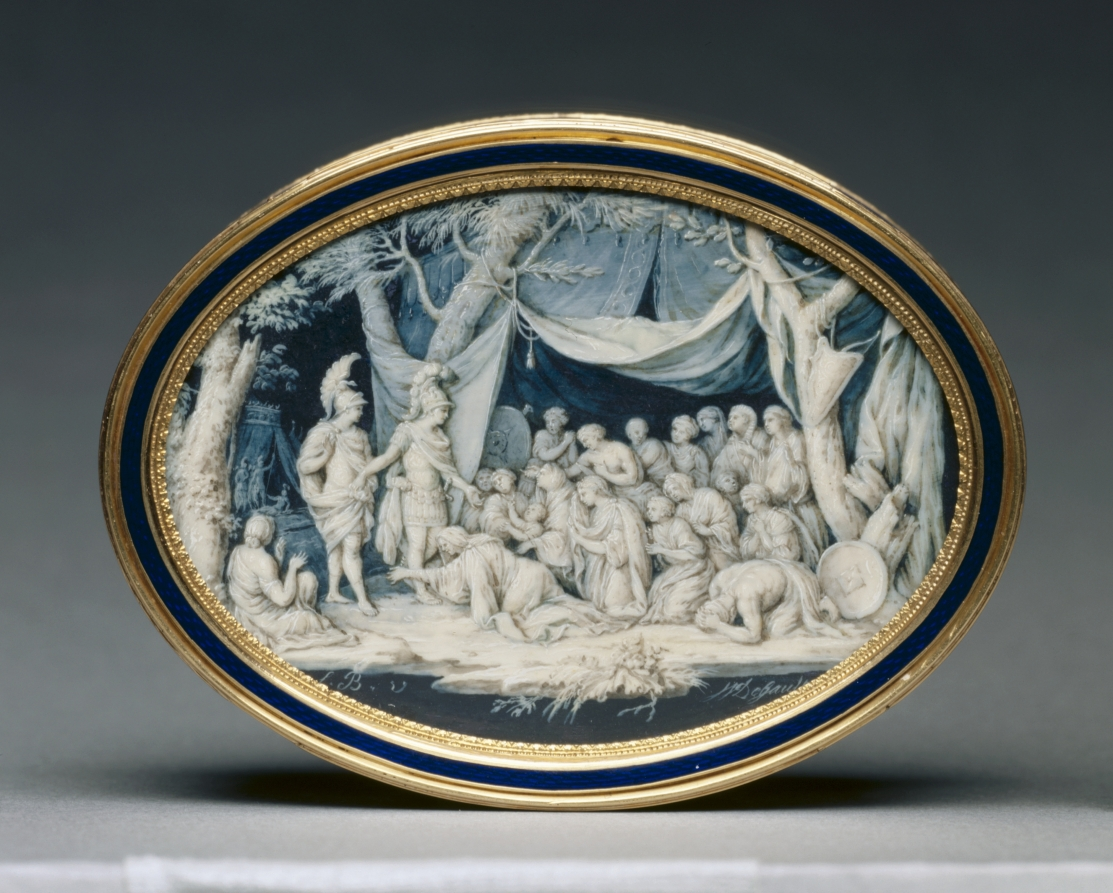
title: Snuff Box (Tabatière)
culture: France, 18th century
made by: Pierre Marie Gault De Saint-Germain (French, 1754–1842)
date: 1779–80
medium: gold and enamel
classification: Miscellaneous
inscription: [Warden's mark for Paris, 1779-1780, inside bottom; inside cover]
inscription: [Illegible maker's mark, inside bottom; inside cover]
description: Decorated with images derived from ancient Greek and Roman history in the style of cameos, intricately carved gemstones, this box evokes the rising neoclassical imagery in France. The scenes on the box recount several key events in the life of Alexander the Great. The enameled works were inspired by a series of prints by Sébastien Leclerc which drew from a series of paintings by Charles Le Brun.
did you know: The original series painted by Charles Le Brun, The Battles of Alexander (Les Batailles d’Alexandre) (1600s), was commissioned by King Louis XIV of France.